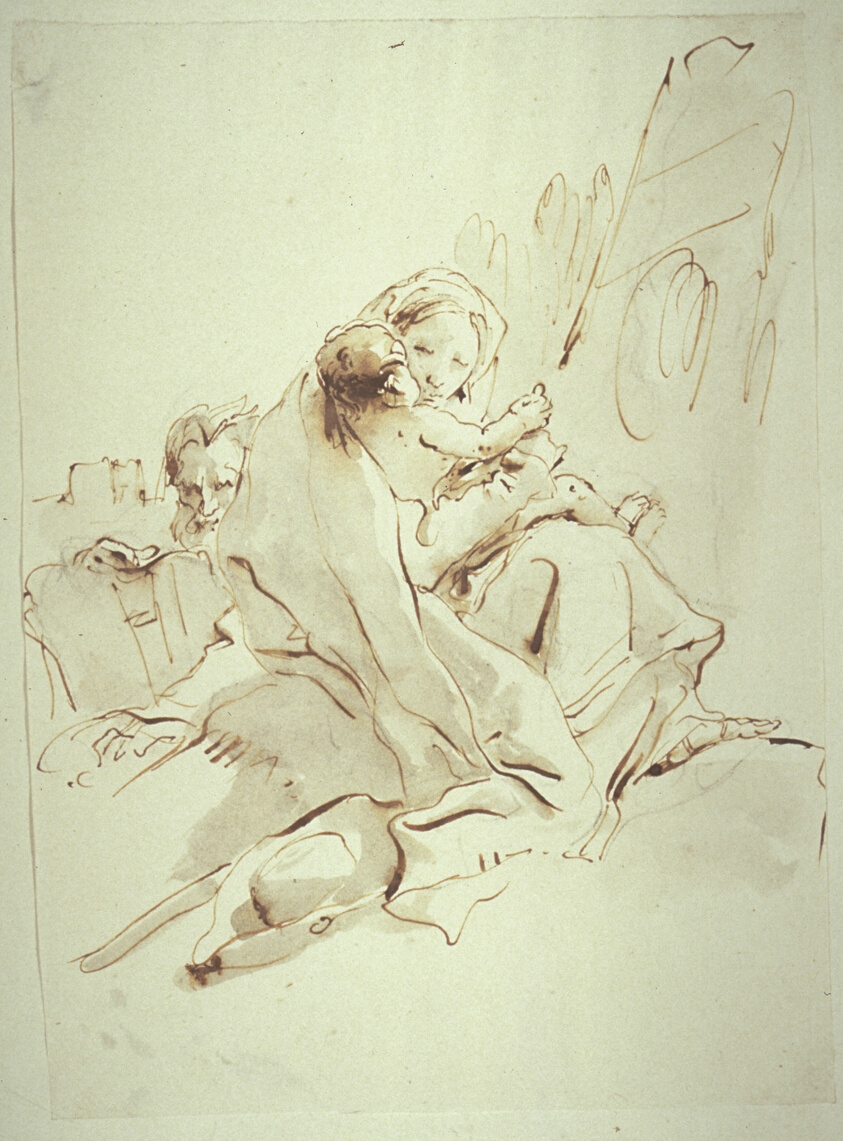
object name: Drawing and Watercolor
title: Rest on the Flight into Egypt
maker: Giovanni Battista Tiepolo (Italian, 1696–1770)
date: c. 1760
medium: Pen and brown ink and brush and gray wash, with black chalk, on ivory laid paper, tipped on ivory laid paper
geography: Italy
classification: pen and ink drawings; drawings (visual works); prints and drawing